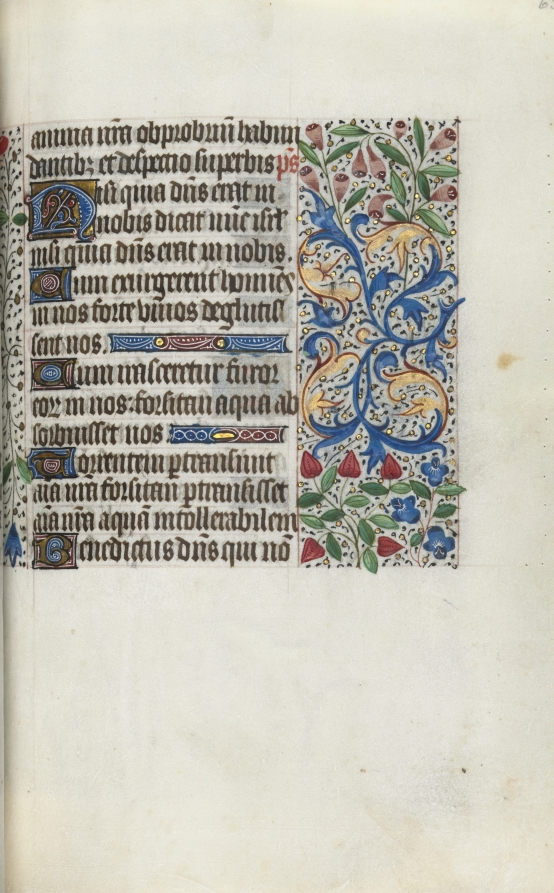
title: Book of Hours (Use of Rouen): fol. 65r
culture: France, Rouen, 15th century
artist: Master of the Geneva Latini (French, active Rouen, 1460–80)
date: c. 1470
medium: ink, tempera, and gold on vellum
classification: Bound Volume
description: In the late 1400s and early 1500s Rouen was an established and important center of book production. The city’s cathedral had a wealthy chapter that spent large sums of money to commission books and to maintain its extensive library. The stationers and booksellers would have likely been concentrated in or near the cathedral precinct. This artist, named after a manuscript now in Geneva, was Rouen’s principal illuminator during the second half of the 1400s.